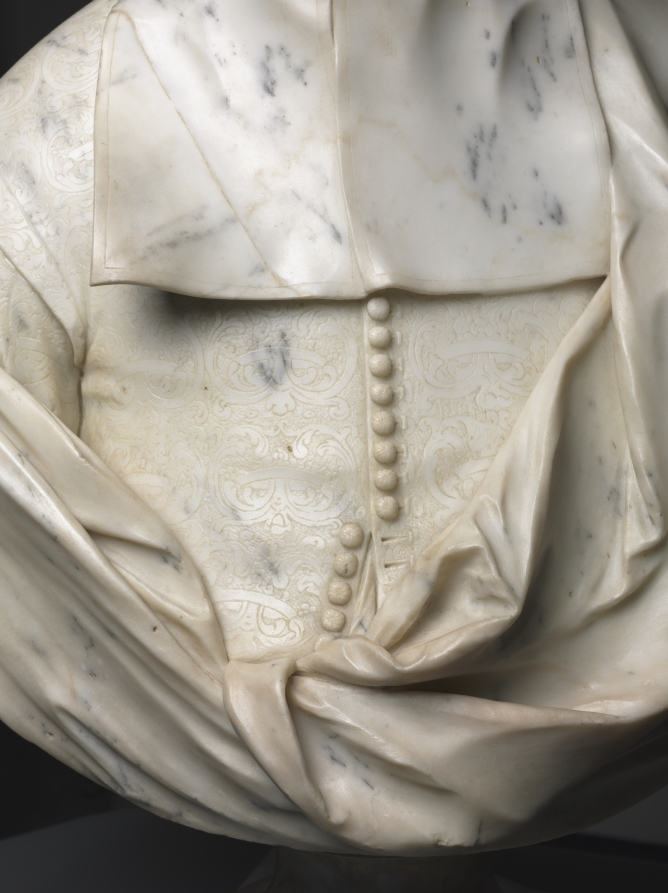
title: Portrait of Fabrizio Naro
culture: Italy, Rome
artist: Domenico Guidi (Italian, 1625–1701)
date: c. 1680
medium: marble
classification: Sculpture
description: This figure’s individualized facial expression, dynamic turn of the head and animated drapery are all characteristic of 17th-century Roman portrait sculpture. Guidi, a pupil of Alessandro Algardi, juxtaposed broad swaths of drapery and deeply drilled and carved hair with delicate surface detail, visible here in the patterning of the jacket and the faint suggestion of a beard. Based on a comparison with a later portrait on the family tomb in the church of Santa Maria sopra Minerva, Rome, the sitter has been identified as Fabrizio Naro (d. 1697), marquis of Mompei.